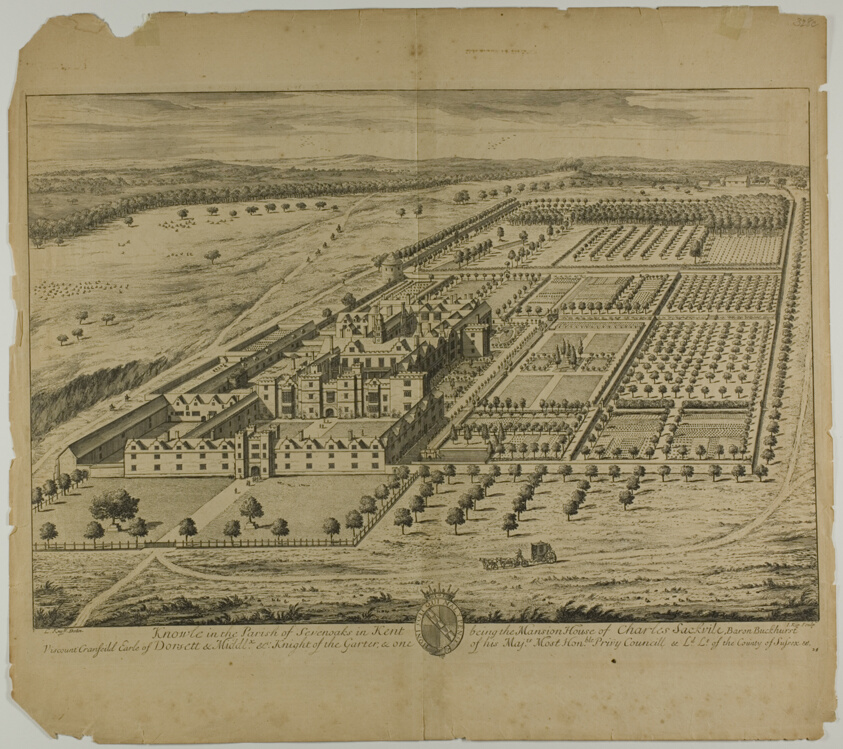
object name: Print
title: Knowle in the Parish of Sevenoaks in Kent, plate 24 from Britannia Illustrata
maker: Jan Kip (Dutch, c. 1653-1722); after Leonard Knyff (Dutch, 1650-1721); published by David Mortier (French, 1673-1728)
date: published 1707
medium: Etching and engraving in black on cream laid paper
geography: Netherlands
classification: prints and drawing; engraving; etching; print